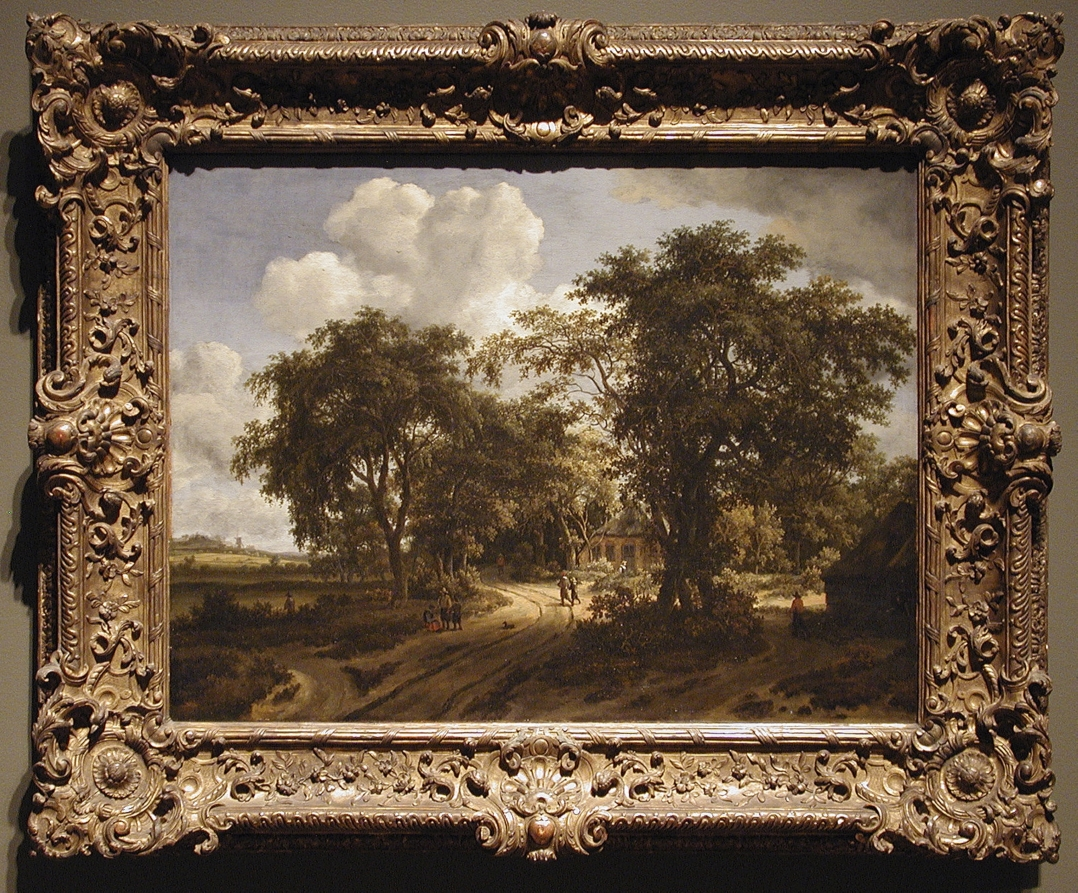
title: A Cottage in the Woods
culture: Netherlands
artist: Meindert Hobbema (Dutch, 1638–1709)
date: c. 1662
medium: oil on canvas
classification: Painting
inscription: Signed lower left: "m. hobbema"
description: Inspired by the native Dutch landscape, Meindert Hobbema specialized in scenes of dense forest growth punctured by winding paths and views toward sunlit clearings that beckon with fertile fields and rustic cottages. Hobbema’s paintings were especially popular among Dutch citizens, who took enormous pride in their land. In addition to nationalistic pride in having recently gained independence from Spain, there was also a profound awareness of the preciousness of land in a low-lying nation, which required dikes, pumps, and constant vigilance to guard against flooding. While the Dutch earned much of their considerable wealth from sea trade, agriculture and livestock were important sources of prosperity.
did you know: A windmill, an important symbol of Dutch identity, can be found in the background of this painting.